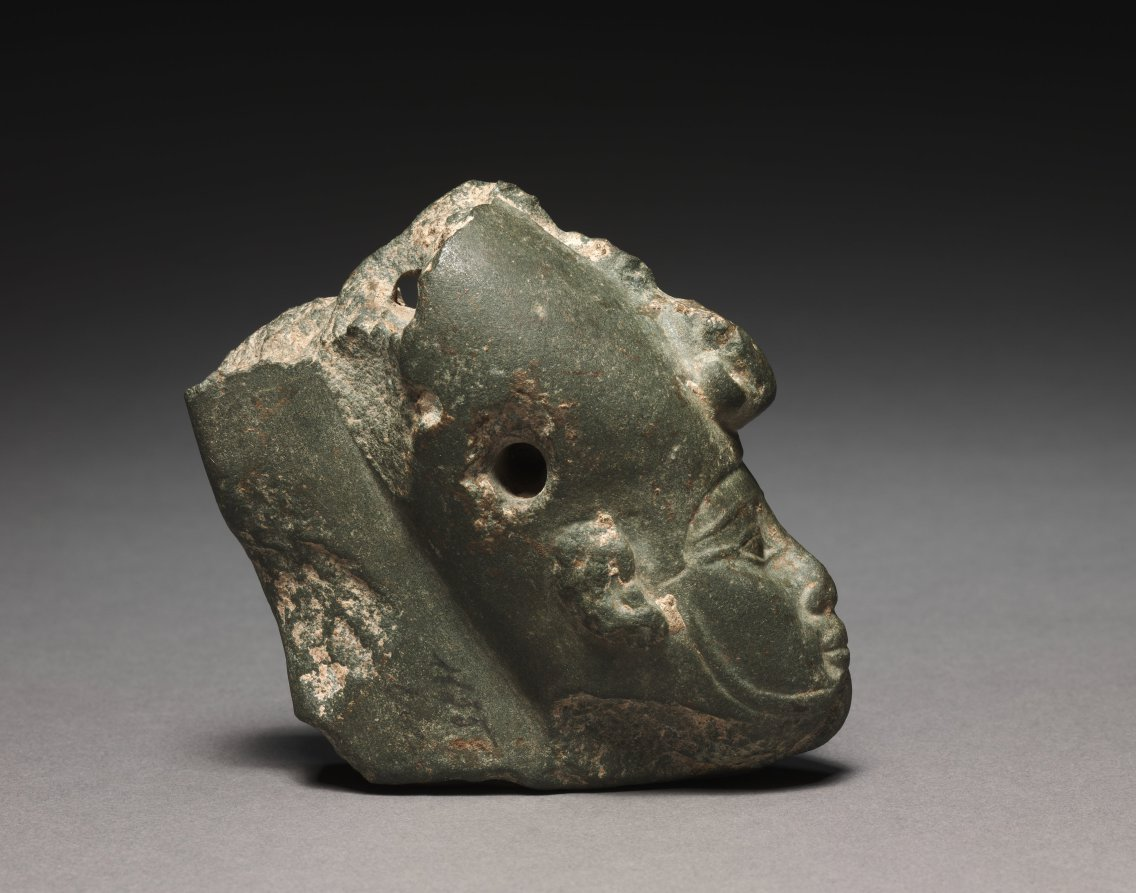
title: Head of a King or Osiris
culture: Egypt, Modern forgery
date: 1900–1915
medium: graywacke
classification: Sculpture